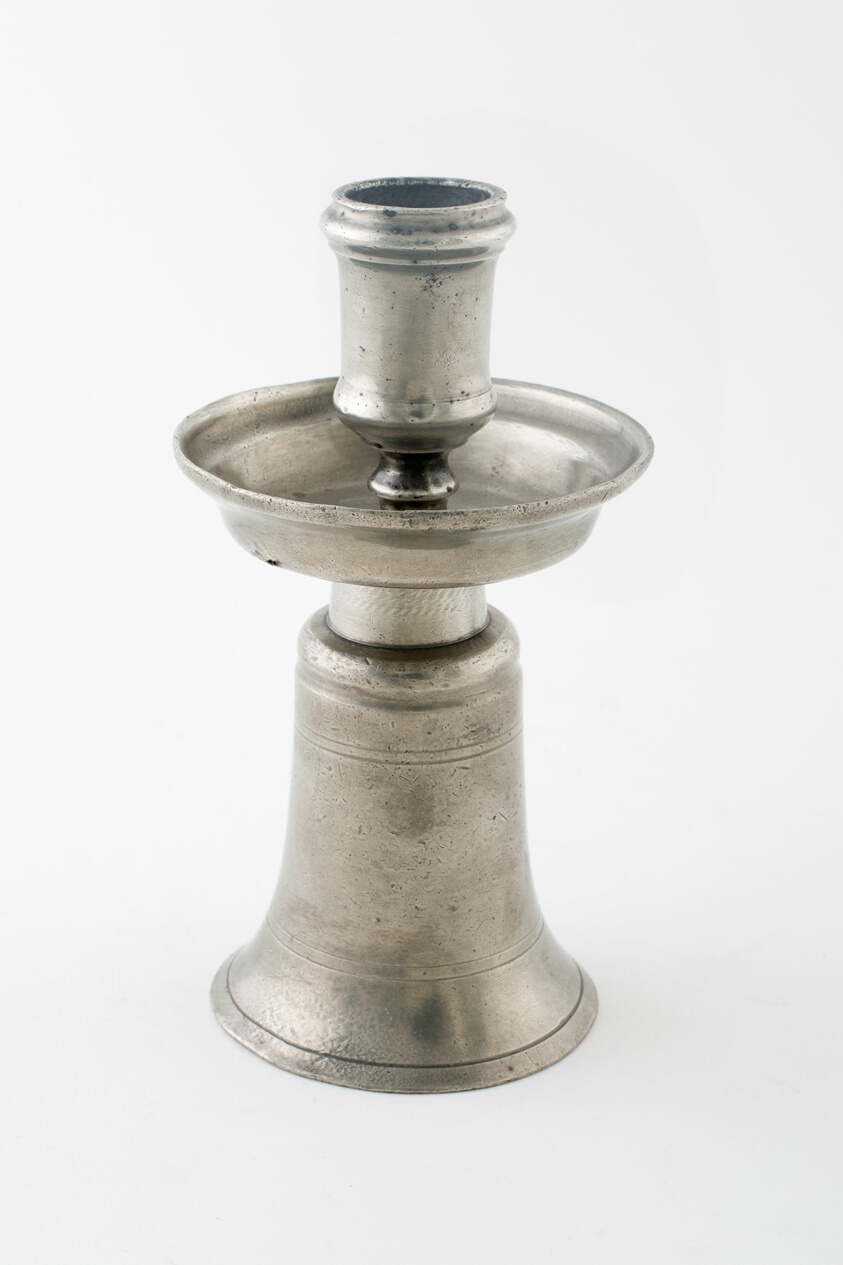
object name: Metalwork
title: Candlestick on Bell-Shaped Base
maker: Netherlands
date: 17th century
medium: Pewter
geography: Netherlands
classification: candleholder - candlestick; candleholder; pewter; metalwork; european decorative arts